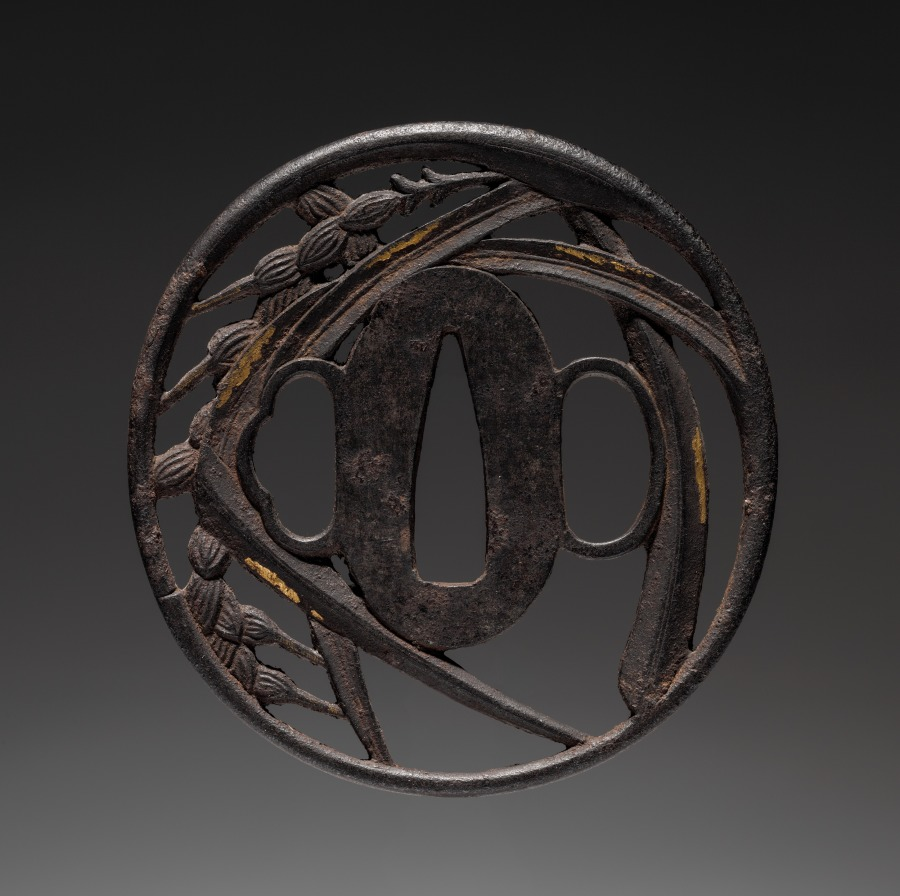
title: Sword Guard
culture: Japan, Edo period (1615–1868)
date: early 1800s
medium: iron (Choshu type)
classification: Arms and Armor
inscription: signed "Masasada, residing in Nagato province."